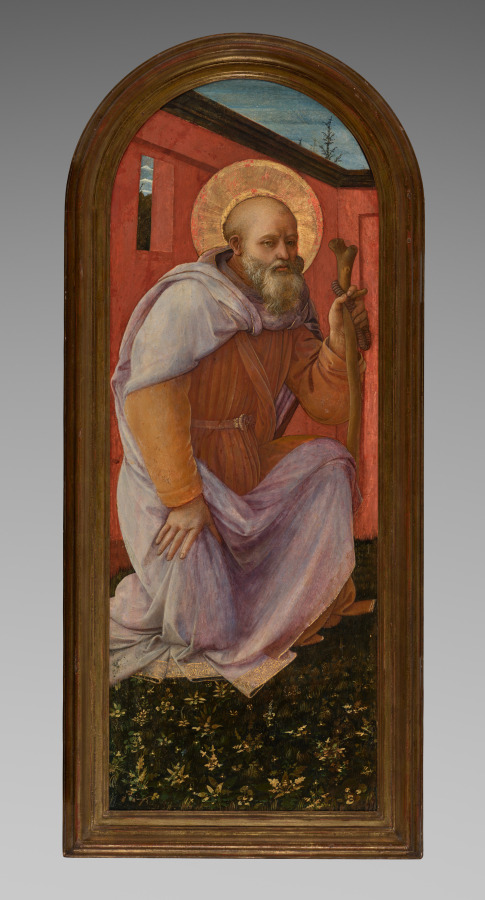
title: Panel from a Triptych: St. Anthony Abbot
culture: Italy, 15th century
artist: Fra Filippo Lippi (Italian, c. 1406–1469)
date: 1458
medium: tempera on wood panel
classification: Painting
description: These panels depicting Saints Anthony the Abbot and Michael originally flanked a central scene of the Madonna and Child with Angels, now lost, to form a triptych. Giovanni di Cosimo de’Medici of Florence commissioned the ensemble in 1457 as a gift to Alfonso V of Aragon. Fra Filippo Lippi, a Carmelite friar and one of the great masters of early Renaissance Florence, depicted realistic, weighty figures in a three-dimensional space using a system of linear perspective, inspired partly by Masaccio’s Brancacci Chapel, and reflected in the background architecture. Saint Anthony the Abbot rejected all earthly possessions in pursuit of a contemplative life in the desert. He is generally regarded as the founder of monasticism and is depicted wearing a monk’s habit. Saint Michael’s sword and shield refer to his role as heaven’s defender against evil.